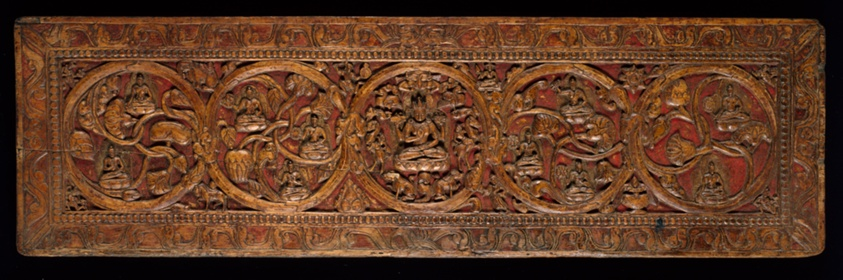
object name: Religious/Ritual Object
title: Book Cover for a Manuscript of the Perfection of Wisdom (Ashtashasrika Prajnaparamita) Sutra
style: Himalayan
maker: Tibet; South Central Tibet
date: 14th century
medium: Wood with traces of red pigment and gilding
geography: Tibet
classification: wood; sculpture; asian art; ritual objects